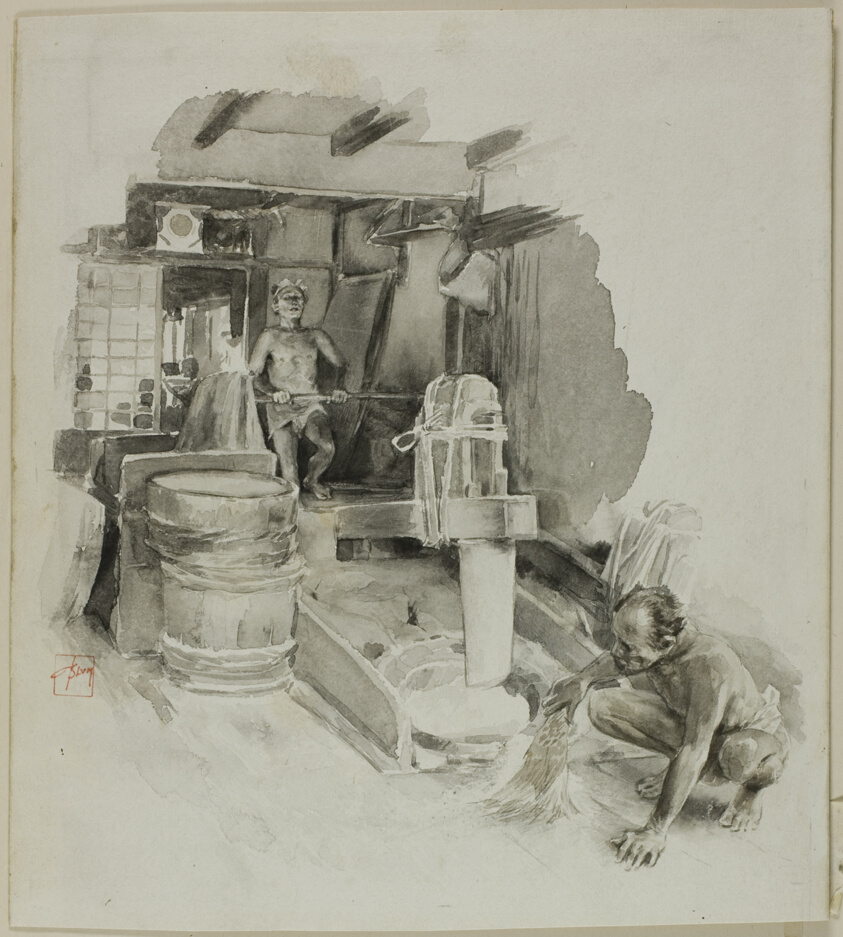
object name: Drawing and Watercolor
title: Pestling the Paddy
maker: Robert Frederick Blum (American, 1857-1903)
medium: Black watercolor on ivory wove paper, laid down on tan wove board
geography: United States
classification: ink or chalk wash; drawings (visual works); prints and drawing